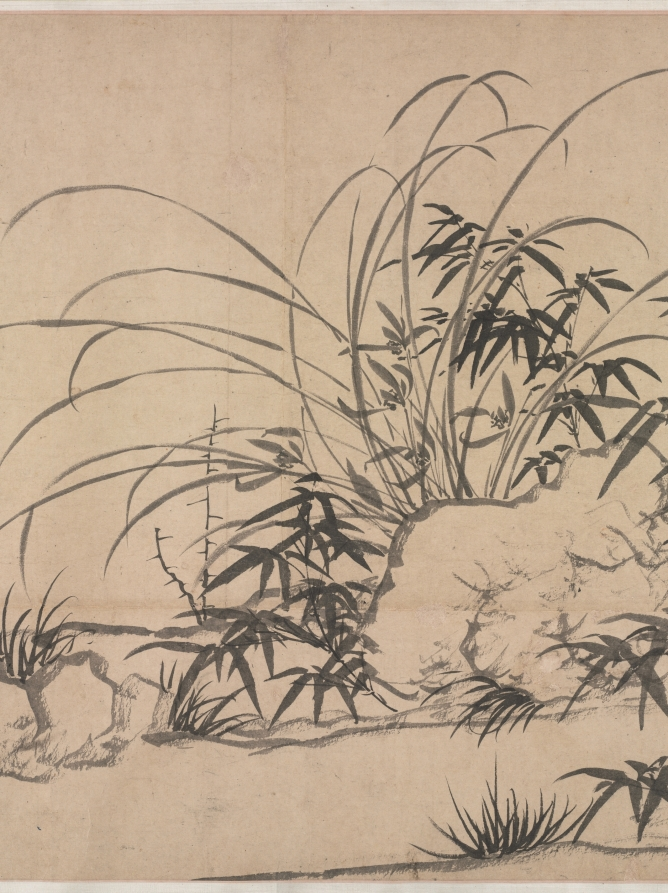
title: Bamboo, Rocks and Lonely Orchids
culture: China, Yuan dynasty (1271-1368)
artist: Zhao Mengfu (Chinese, 1254–1322)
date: 1271–1368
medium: Handscroll; ink on paper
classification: Painting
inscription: 竹石幽蘭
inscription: 孟頫為善夫寫. [印] 趙氏子昂; [印] 松雪齋; [印] 天水郡圖書印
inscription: 古人善書者必能畫點墨作蠅，便自有生意。松雪翁蘭石草聖飛帛筆法皆具，可寶也。安陽韓性 [印]明善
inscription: Colophon 2. Qiu Yuan 仇遠 (1247-after 1328), a respected poet during the Song and Yuan periods. He was linked to, among others, Zhao Mengfu and Gao Kegong. Zhao Mengfu painted a version of Nine Songs 九歌圖 for him, and Gao Kegong dedicated to him a painting titled Mountain Village 山村圖 (current whereabouts unknown). His poem here is also preserved in his collected works.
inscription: Colophon 3. Zheng Yuanyou 鄭元祐 (1292-1364), an erudite scholar and teacher of renown, active in Hangzhou and Suzhou. In the 1350s, when Gu Ying’s literary gatherings were at their peak, he was already elderly and participated in a limited way.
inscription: Colophon 4. Wu Kegong 吳克恭 (active mid-1300s), a friend of Gu Ying and Ni Zan 倪瓚 (1301–1374), a major Yuan painter.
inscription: Colophon 5. Angji 昻吉 (jinshi of 1348), of Western Xia 西夏 origin and a poet of distinction. He wrote an introduction to the painting Literary Gathering at Yushan 玉山雅集圖, of which Zhang Wo was the painter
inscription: Sheet 2. Yuan: friends of Gu Ying Colophon 6. Wang Zifang 王孜方 (active mid-1300s), an official who, at the time of his visits to Gu Ying’s estate, had reached the rank of Minister. He is better known under the name Wang Keju 王可矩.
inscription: Colophon 7. Ke Jiusi 柯九思 (1290–1343), a major official who served in the Kuizhang Pavilion 奎章閣 and as an advisor to Emperor Wenzong in matters of calligraphy and painting.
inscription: Colophon 8. Yu Li 于立 (active mid-1300s), a Daoist recluse, poet, and close friend of Gu Ying, so much so that during his visit to Gu Ying’s estate he was given accommodation in a special pavilion. His poem here is also preserved in Gu Ying’s Cao tang ya ji.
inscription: 至正十一年十月廿八日男奕百拜堇觀 [印] 趙奕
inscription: Colophon 10. Yu Ji 虞集 (1272-1398), a major official and literary figure who also served in the Kuizhang Ge. His poem is recorded in his collected works. The poem is one of a set of four inscribed at the request of Wang Huayu 汪華玉 on Orchids and Rock 蘭石圖 by Zhao Mengfu, obviously a different, long lost, painting. Wang Huayu was an official and a collector (jinshi of 1327). Yu Ji’s colophon here was written before 1348 and during his retirement in Linchuan 臨川, Jiangxi, possibly sent from there. It is possible he had not seen the painting, and his calligraphy here appears to be rather casual and detached, jotting down an old poem without much care, contrary to his earlier practice.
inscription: Colophon 11. Sun Shi 孫時 (mid-1300s–early 1400s), a native of Yuncheng 鄆城, Shandong, and a jinshi of 1390. He may have been quite young when paying a visit to the Yushan gatherings in the late 1340s and early 1350s.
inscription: Colophon 12. Zhang Zhu 張翥 (1287–1368), Qiu Yuan’s disciple and a poet of renown, who enjoyed a belated career in officialdom and was known for his integrity.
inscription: Sheet 4. Yuan and Ming: further friends of Gu Ying; colophon 17 begins the early Ming sequence. Colophon 13. Zhang Wo 張渥 (active c. 1336-after 1364), a frustrated scholar, a poet, and a painter of landscape and figures. An active participant in Gu Ying’s literary circle, he painted the Literary Gathering at Yushan, a pictorial document of the individuals and activities on Gu Ying’s estate. His rendering of Nine Songs is well known, and one version is in the collection of the Cleveland Museum of Art (see 1959.138). His poem here is also found in Gu Ying’s Cao tang ya ji, under the entry “ti Zhao Hanlin mo lan 題趙翰林墨蘭” (inscribed on the Ink Orchid by Zhao the Hanlin academician). This is a rare instance of calligraphy as well as signature by the artist.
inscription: 觀吳興公竹石幽蘭圖使人鄙吝頓消。其筆勢從橫天真爛澷，一出於二王書法。冝仲瑛寳而玩之異於常品也。至正八年十月天台陳基書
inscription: Colophon 15. Zhang Shen 張紳 (active about 1340–after 1385), a respected calligrapher and participant in Gu Ying’s literary gathering. He resided in Kunshan, the same city where Gu Ying’s estate lies. In the third line of the poem, he mentioned Gu Ying’s hao, “Jinsu 金粟.” This was a name he assumed later in life, after the death of his mother in the year 1356. Thus this inscription must have been written after that date.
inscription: Colophon 16. Wang Sun 汪遜 (active mid-14th century), a little-known native of Kuaiji 會稽, who may have been one of the infrequent visitors to Gu Ying’s estate.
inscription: Colophon 17. Hu Guang 胡廣 (1370-1418) is the first Ming colophon writer on this scroll. He was an official of great power in the court and a trusted advisor of Emperor Chengzu; he served as the Grand Academician of the Hall of Literary Profundity 文淵閣大學士 and Grand Academician of the Left Secretariat of the Heir-Apparent 左春坊大學士.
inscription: Sheet 5. Early Ming Colophon 18. Wang Yinshi 王尹實 (active about 1403–about 1424), a native of Siming 四明, Zhejiang, and a minor official and calligrapher.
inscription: Colophon 19. Zhang Yuchu (signed here as “Wuwei 無 為”), the forty-third Heavenly Master of the Zhengyi sect of Daoism. A man of erudition, he was also a poet, painter, and calligrapher. A modified version of the poem here was published in his collected works titled Xian quan ji 峴泉集. A slight modification in the first line is the only change: “Wu xing miao yao nian bing xue zi 吳興玅年氷雪姿.”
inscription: Colophon 20. Yao Guangxiao 姚廣孝 (1335-1418), a Buddhist monk, scholar, and counselor to Chengzu in his successful attempt at usurpation of the throne. Yao Guangxiao was a controversial figure but wielded enormous power.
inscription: Sheet 6. Wang Ning alone Colophon 21. Wang Ning 王寧 (d. 1411) signed as “Qingzhen 清真” in this colophon. One of the three seals reveals his identity as the Yongchun Hou 永春侯 [Marquis of Lasting Spring] (appointed 1402), and the husband of Princess Huaiqing 懷慶公主 (1328-1398), the sixth daughter of the founder of the Ming dynasty, Zhu Yuanzhang. This colophon postdates 1402.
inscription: Sheet 7. Mid-Ming Colophon 22. Ou Yi’an 區易安 (active first half of 15th century), unknown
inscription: Colophon 23. Chen Lian 陳璉 (1370-1454), a native of Dongguan 東莞, Guangdong 廣東, and an official admired for his erudition and perspicacity. In view to the known calligraphic style of Chen Lian, this colophon appears to be a transcription and not written by him.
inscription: Colophon 24. Wei Ji 魏驥 (1374-1471) enjoyed longevity (he lived to the age of ninety-eight) and an extended length of service as an official. A jinshi of 1406, he eventually became the Minister of Personnel in Nanjing 南京吏部尚書. The colophon here is dated 1434, when he was invited to view the painting by the Court Musician Mo Zhizhong 莫至翀, its owner. Again, in view of its calligraphic style, this was not written by him, but is a transcription from the original.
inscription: Colophon 25: Zhang Yi 章鎰 (active 1462-1473), a Ningbo native and an official with a reputation for courage and integrity.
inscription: Sheet 8. Further mid-Ming Colophon 26. Yin Zhi 尹直 (1427-1511), a controversial figure in Ming politics in spite of his erudition and high position as the Minister of War 兵部尚書.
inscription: Colophon 27. Zou Yu 鄒虞 (active 1460-1520; jinshi of 1490), a native of Hangzhou. In 1510, he was appointed Administrative Vice Commissioner in Guangdong.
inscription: Sheet 9. Xu Shouhe 徐守和 alone Colophon 28. Xu Shouhe 徐守和 dated his entry in 1629. Since he wrote it in his own studio, The Lesser Qingbi Pavilion 小清閟, he was likely the owner of the scroll. Xu’s life is not well documented; he was a connoisseur of note during the last years of the Ming dynasty rule. He may have acquired the Cleveland scroll from Wu Ting, whose seals appear here.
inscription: Sheet 10. The mounter’s note. Xu Shudong 徐曙東 of Jiaxing 嘉興 made the remounting on the first day of sixth month, 1802.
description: Bamboo and orchids are motifs associated with the virtues of the scholar-official. Bamboo that bends but does not break stands for moral integrity, endurance, and loyalty. Wild, fragrant orchids that bloom in the shadow symbolize modesty and the aura of learnedness. Rocks are often considered to be miniature versions of mountains that form the universe. This monochrome ink painting is brushed on paper in a masterfully calligraphic manner. While the rocks are delineated in chalky, dry strokes showing the effect of flying white (feibai), the bamboo and orchids are drawn with a swift brush demonstrating the virtuosity of the artist.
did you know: One of the many inscriptions records that the handscroll was last remounted by Xu Shudong 徐曙東 of Jiaxing 嘉興 in 1802.